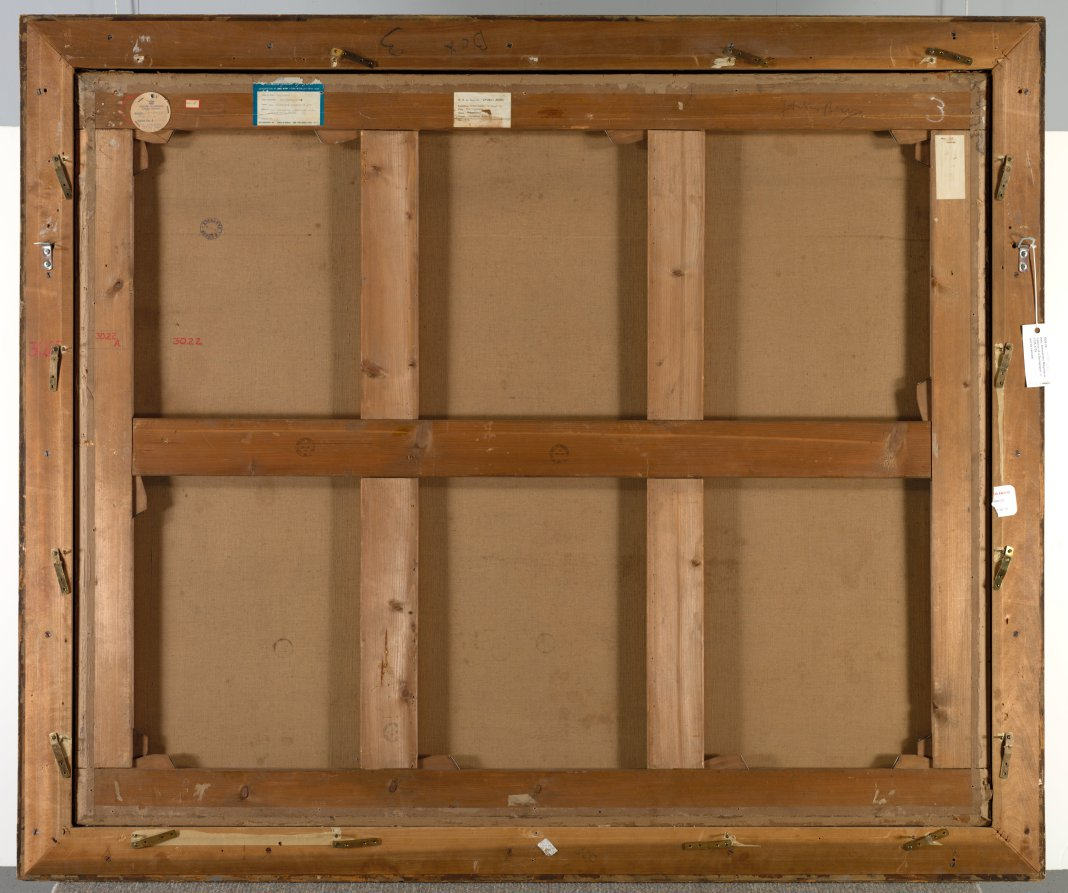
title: Interior of a Synagogue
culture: Italy, 18th century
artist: Alessandro Magnasco (Italian, 1667–1749)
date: c. 1725–35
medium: oil on canvas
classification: Painting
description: The Jewish synagogue was among Magnasco's most frequently painted subjects, here presented in a mystical and imaginative way. Expansive architectural space creates room for a multitude of tiny, fantastical figures with elongated limbs. These characters respond to the service with emotion and expressive gestures. Flashes of light dash across the surface against a dark, muted palette of earthy tones suggesting an otherworldly presence. The composition invites the viewer to enter the space and experience the service. Though he used characteristic elements of Baroque composition and was strongly influenced by Venetian painting, Magnasco's loose brushwork, elongated figures, and mysterious subject matter set him apart. Magnasco peers into a world of which he was not part: he was not Jewish and probably perceived Jews as outsiders. At the dawn of the Enlightenment in Europe progressive aristocratic families commissioned paintings by Magnasco, suggesting the painter's support for Enlightenment ideals which included religious tolerance, but Magnasco's personal views on Judaism in Italy remain unknown.